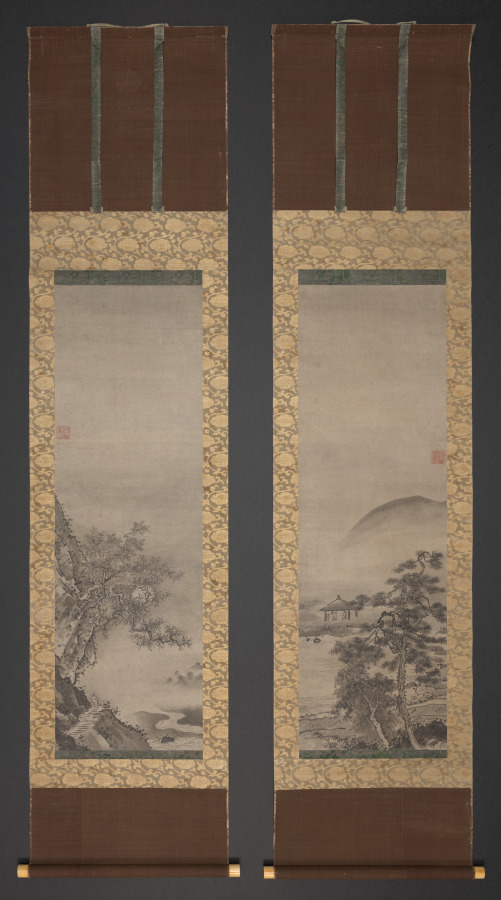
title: Landscapes with Figures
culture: Japan, Muromachi period (1392–1573)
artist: Shūgetsu Tōkan (Japanese, 1440?-1529)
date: c. 1500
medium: pair of hanging scrolls; ink on paper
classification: Painting